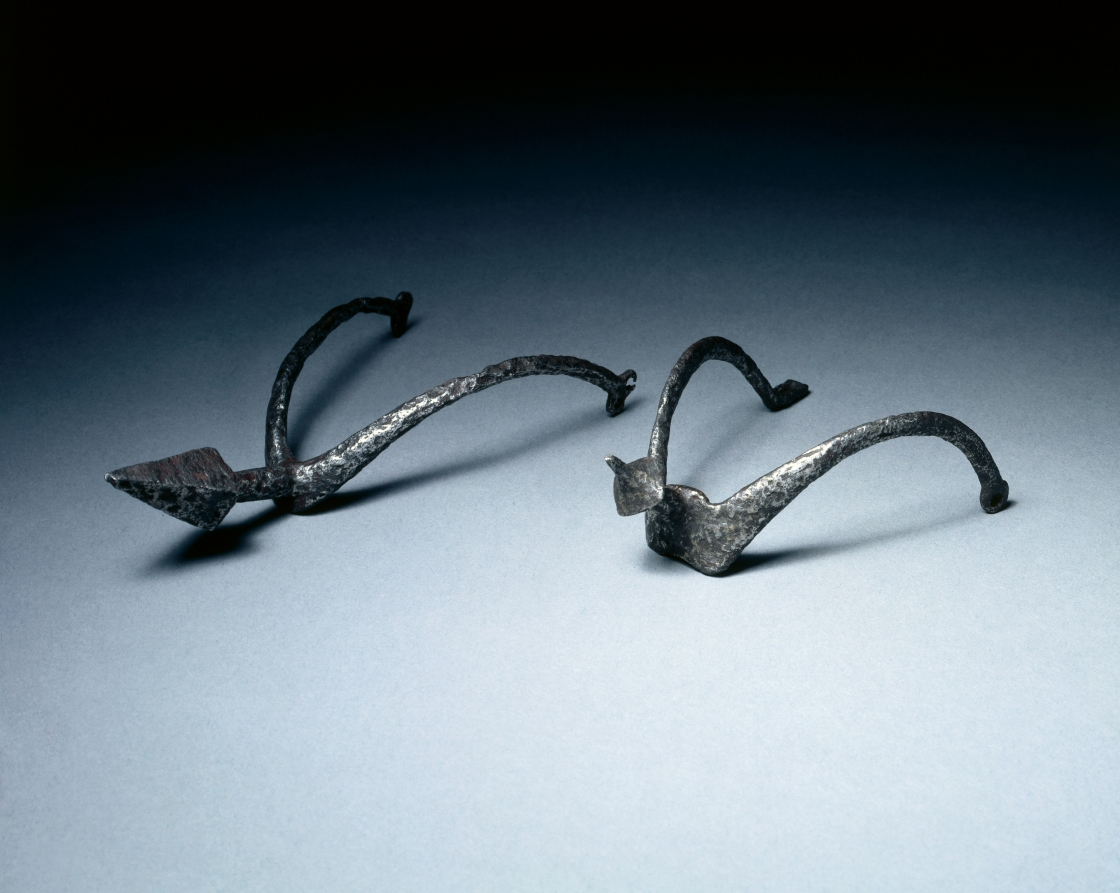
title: Pricked Spur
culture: Spain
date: 1200s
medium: steel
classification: Arms and Armor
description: The spur was an essential part of the knight's equipment. Fastened to his heels by means of straps and buckles, it was used to prod a horse into action. These examples represent the oldest type recorded, the "pricked" spur, so-called because its neck terminated in a spike. The pricked spur was replaced during the Middle Ages by the "rowel" spur, with a rotating spiked wheel.